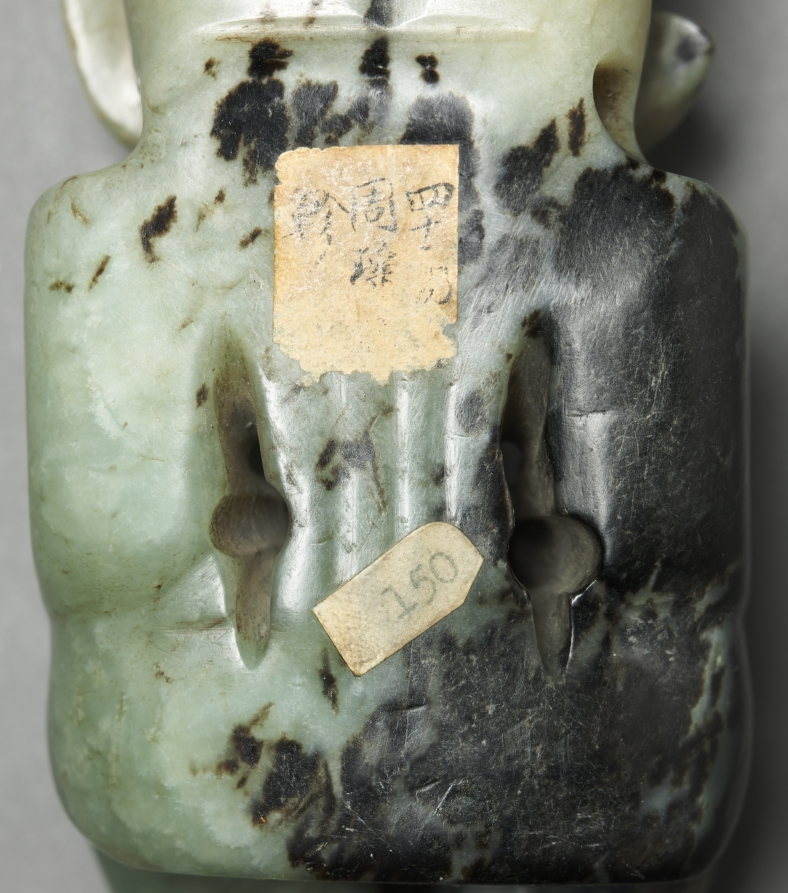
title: Amulet in the Form of a Seated Figure with Bovine Head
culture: Northeast China, Neolithic period, probably Hongshan culture (4700–2920 BCE)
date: c. 4700–2920 BCE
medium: jade (nephrite)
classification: Jade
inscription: There are two paper labels on the back of the jade pendant: one partial label with Chinese characters and one with the typed number "150".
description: With a bovine head and four horns, this seated figurine was a powerful ritual and shamanic symbol. Drill holes above its shoulders form two interconnected perforations for suspension, suggesting that the jade was originally used as a pendant, presumably by the shaman performing the tasks of journeying to and communicating with the supernatural realms.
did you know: CMA daringly acquired this masterpiece without knowing exactly what it was. Only after Chinese archaeologists started excavating similar jades in Northeast China could it be attributed to the Hongshan culture.